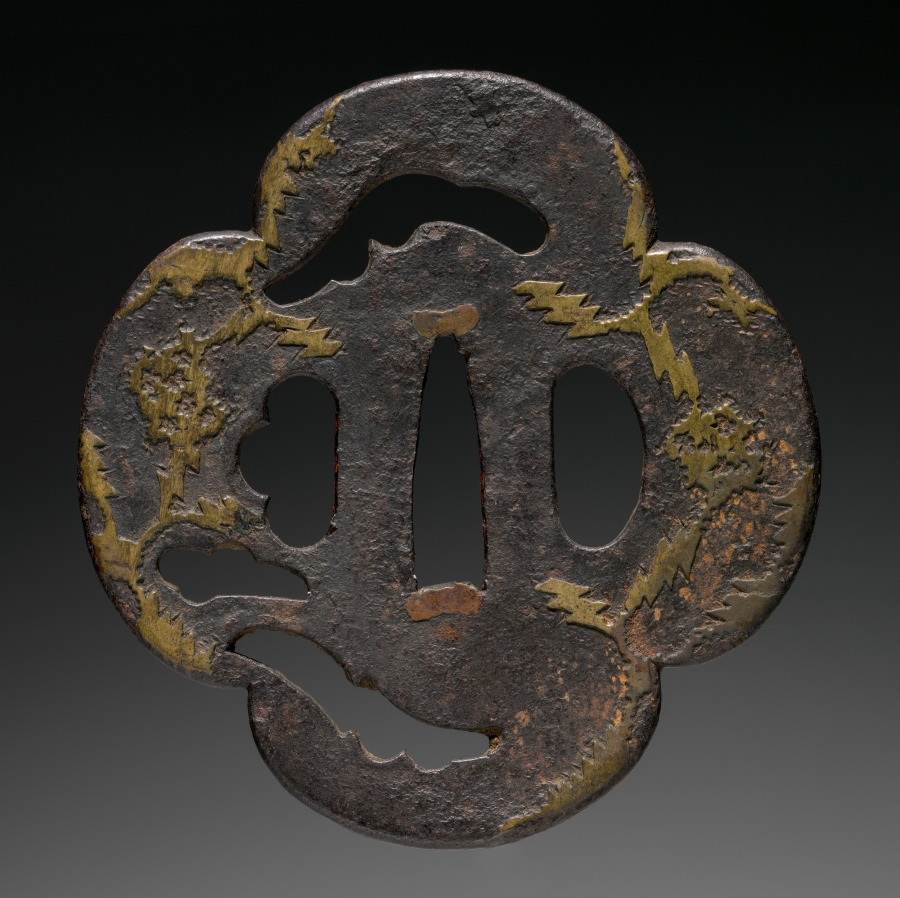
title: Sword Guard (Tsuba)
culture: Japan, possibly Edo period (1615-1868)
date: c. 1615–1868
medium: iron with brass inlay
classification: Arms and Armor